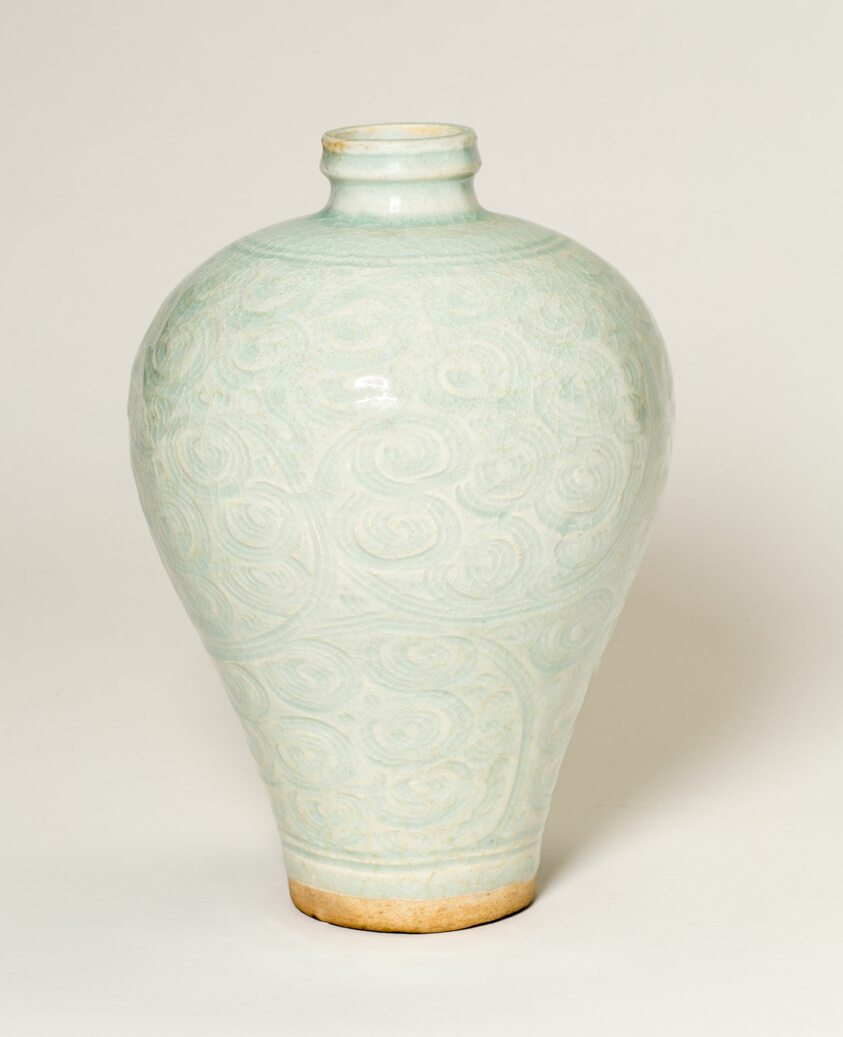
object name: Vessel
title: Bottle Vase (Meiping) with Stylized Spirals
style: Chinese (culture or style)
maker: China; Jiangxi province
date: Song dynasty (960–1279), 12th/13th century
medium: Qingbai ware; porcelain with underglaze incised and stippled decoration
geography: China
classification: vase; vessel; porcelain; asian art; ceramics